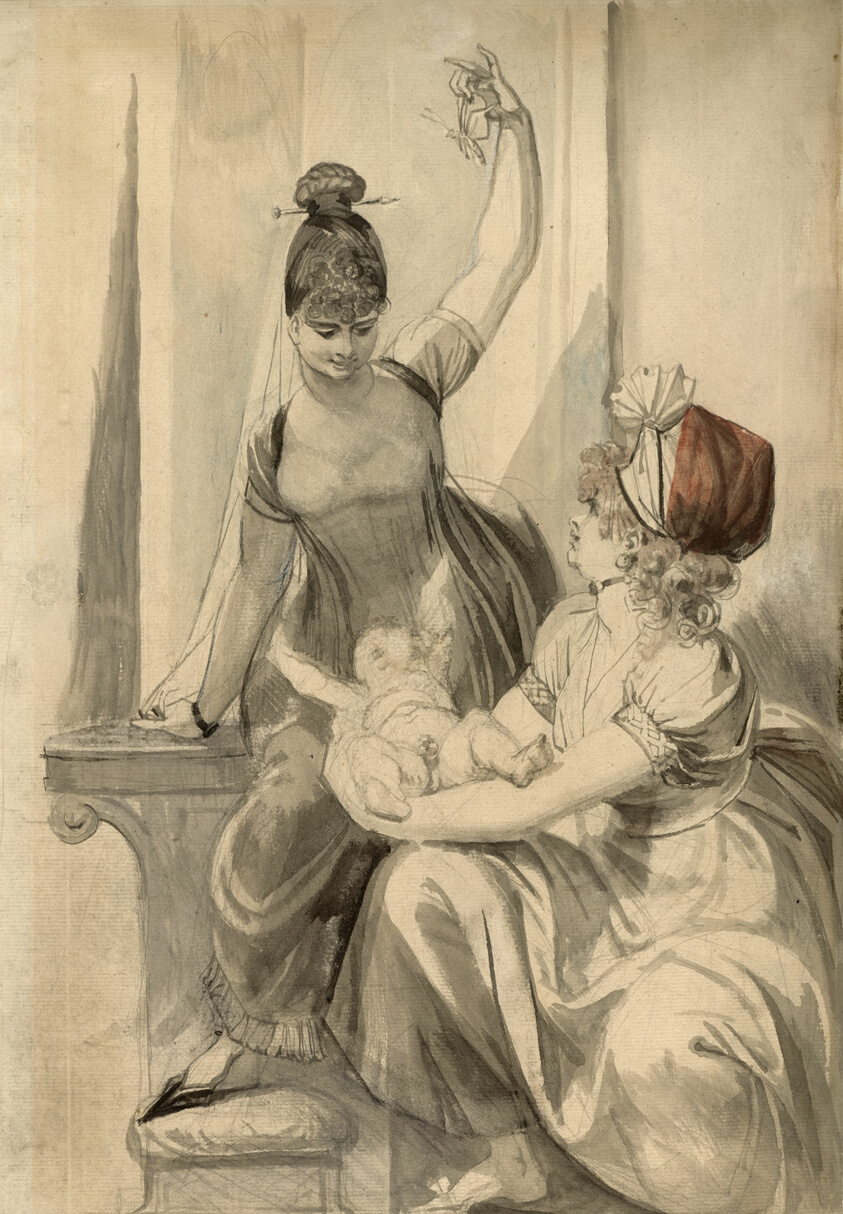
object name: Drawing and Watercolor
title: Mother and Her Family in the Country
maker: Henry Fuseli (Swiss, active in England, 1741-1825)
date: 1806/07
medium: Pen and black ink, and brush and black and gray wash, with watercolor and traces of white gouache, over graphite, on ivory laid paper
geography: Switzerland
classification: pen and ink drawings; drawings (visual works); prints and drawing; paper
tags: mothers, children